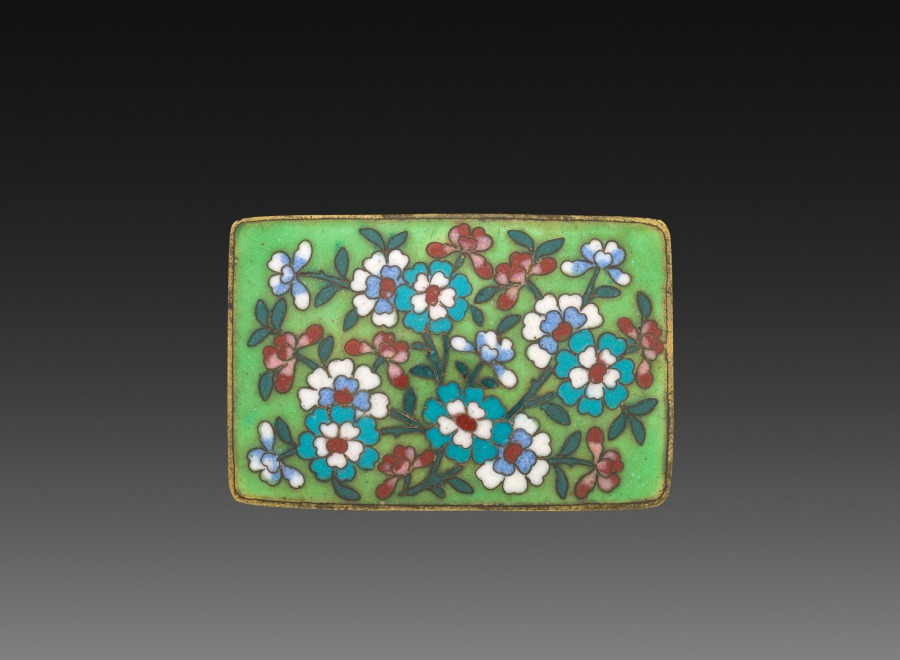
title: Belt Buckle with Flowers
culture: Japan, Meiji period (1868–1912) to Taishō period (1912–26)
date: early 1900s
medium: cloisonne enamel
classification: Enamel